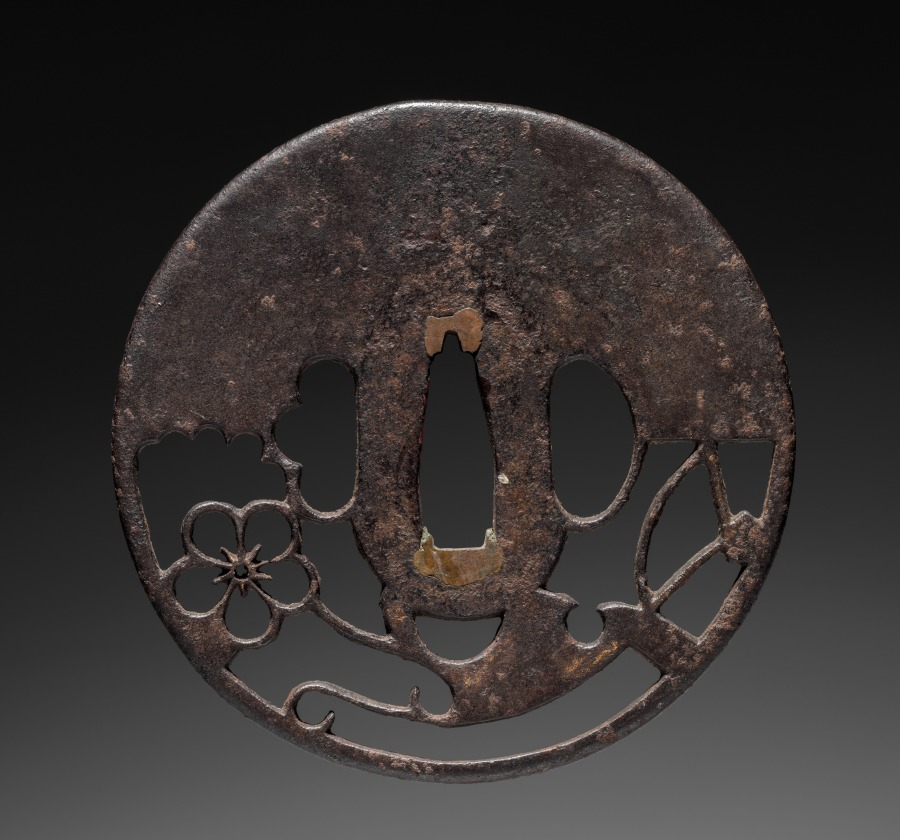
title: Sword Guard (Tsuba) with Plum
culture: Japan, possibly Edo period (1615-1868)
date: c. 1615–1868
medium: iron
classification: Arms and Armor